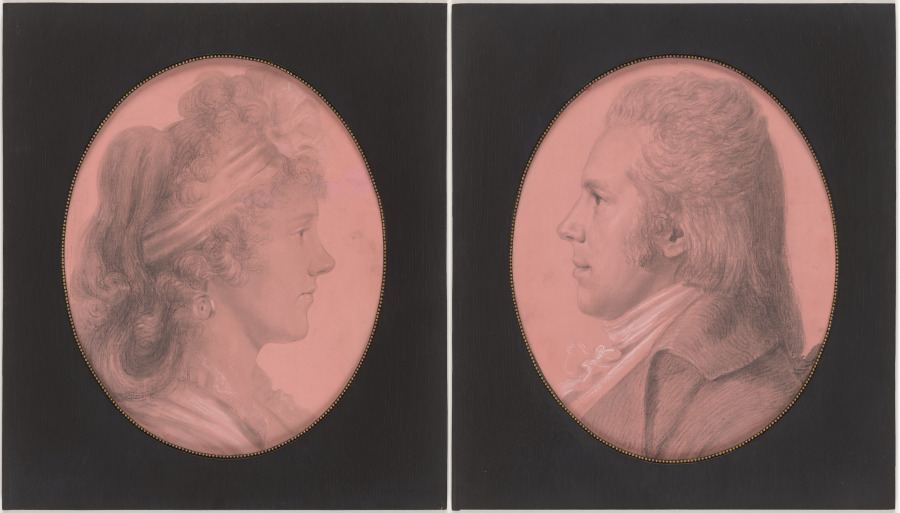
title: Portrait of Eleanor Ramsay Fitzwilliam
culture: France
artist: Charles Balthazar Julien Fevret de Saint-Mémin (French, 1770–1852)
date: c. 1790–1852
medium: Black and white chalk on buff paper with pink wash in original frame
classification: Drawing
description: This portrait and its pair (2024.35.1), depict George Fitzwilliam, an English merchant, and his American wife Eleanor Ramsay Fitzwilliam, who sat in New York for the French émigré artist Charles Balthazar Julien Févret de Saint-Mémin. Saint-Mémin used a recently invented mechanical device called a physiognotrace to trace accurate profiles of his sitters, which he then completed in black and white chalks. The technology enabled Saint-Mémin to establish a thriving business catering to prominent Americans—including Presidents Washington, Adams, Jefferson, and Madison, Benjamin Franklin, and several Native American chiefs—at a time when he was in exile from the French Revolution. As part of each commission, Saint-Mémin also supplied etchings of the portrait in a reduced size, which could be given as keepsakes to family and friends.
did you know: The physiognotrace device used to create this portrait consisted of a wooden frame within which a sitter posed in profile; the artist then peered through an eyepiece and followed the contour and features of the sitter’s face by maneuvering a graphite pencil attached to the mechanism.